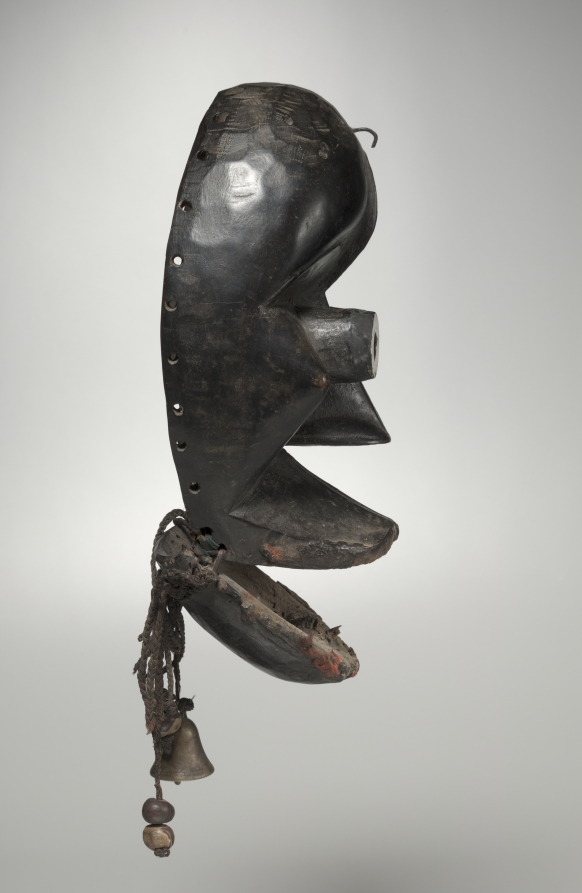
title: Mask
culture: Africa, West Africa, Liberia, Mano-style carver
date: early 1900s, before 1933–37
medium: Wood, copper alloy, plant fiber, cloth, rawhide or leather, teeth, seeds, resin, synthetic material, iron, and glass beads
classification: Mask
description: Generally, Mano masks are considered to be manifestations of forest spirits and can be grouped into 11 major types relating to aspects of social control, political and judicial matters, peacemaking, education, competition, and entertainment. This mask was acquired in Liberia by the medical missionary George Harley between 1933 and 1937.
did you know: The jaw of this mask is hinged, allowing it to open and close.